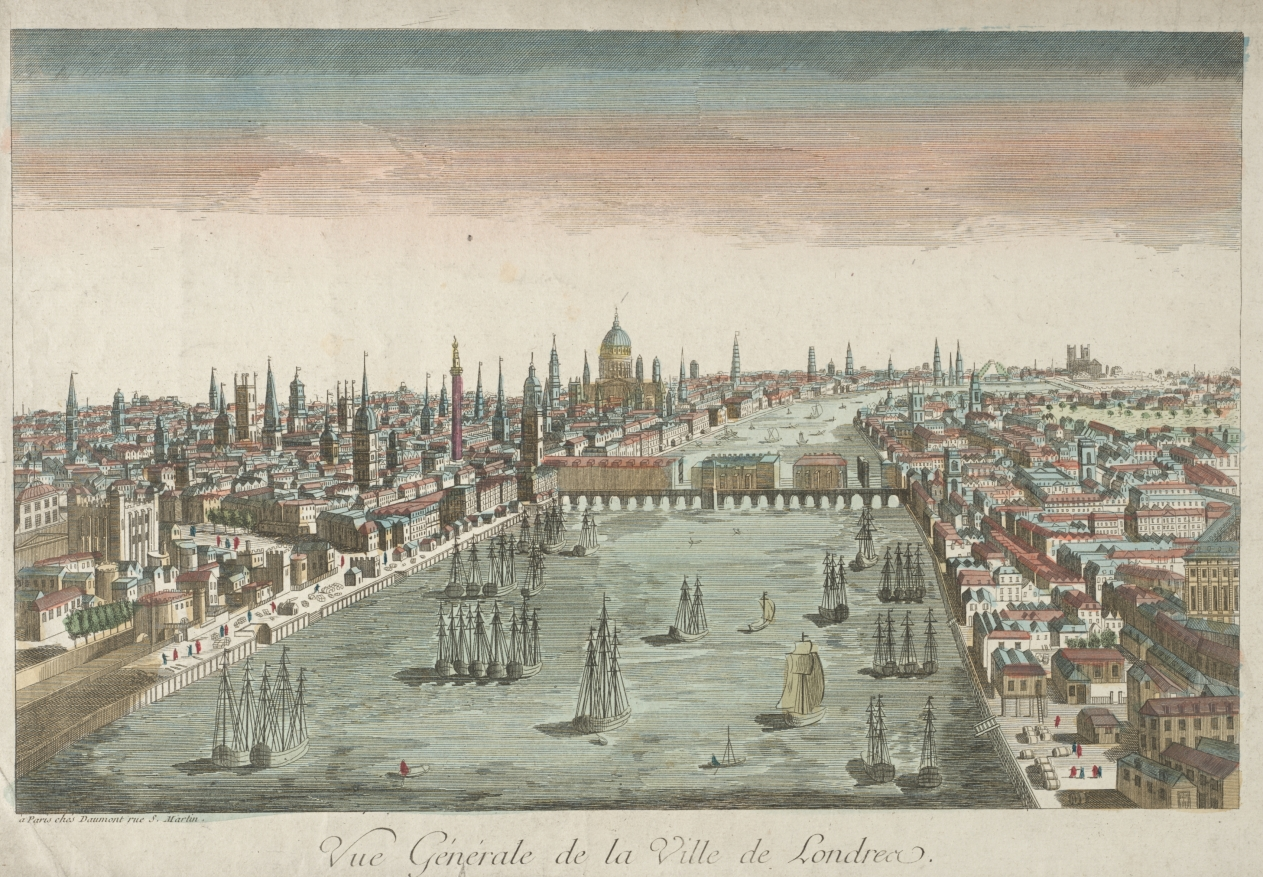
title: General View of London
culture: England, 18th century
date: 1700s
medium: Hand-colored engraving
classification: Print